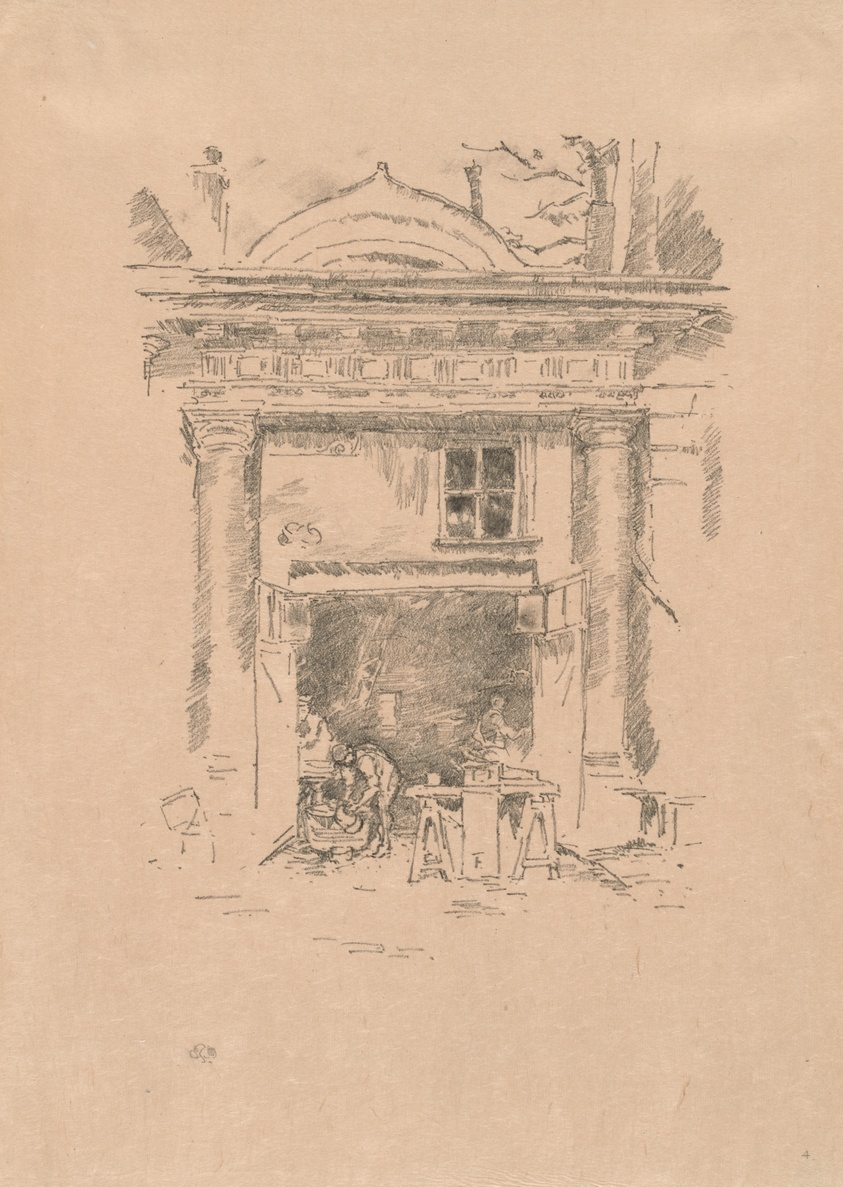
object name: Print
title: The Whitesmiths, Impasse des Carmélites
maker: James McNeill Whistler (American, 1834-1903)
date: 1894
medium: Transfer lithograph in black with stumping, on cream laid Japanese vellum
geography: United States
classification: transfer lithograph; lithograph; print; prints and drawing